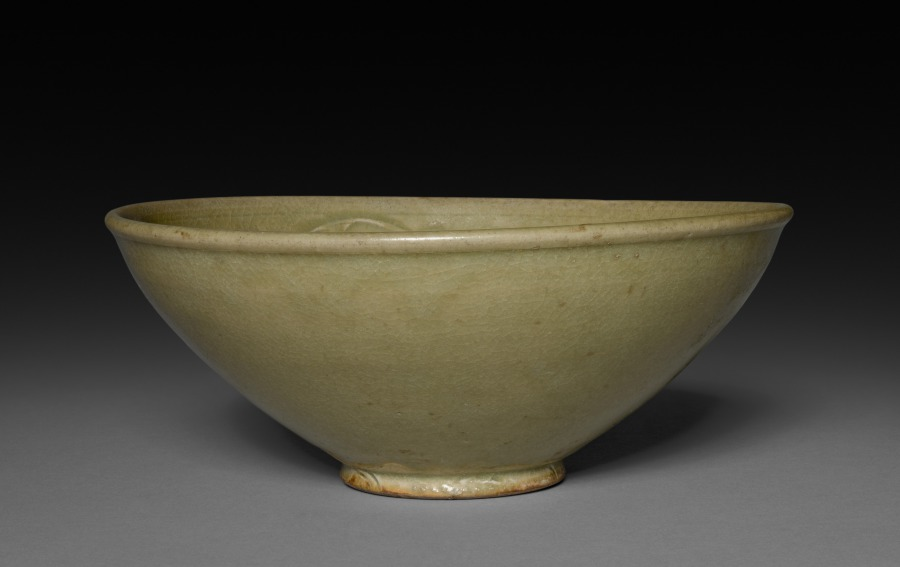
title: Bowl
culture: China, Jin dynasty (1115-1234)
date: 1100s-1200s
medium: Glazed light gray porcelain, Northern Celadon ware, Yaozhou type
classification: Ceramic